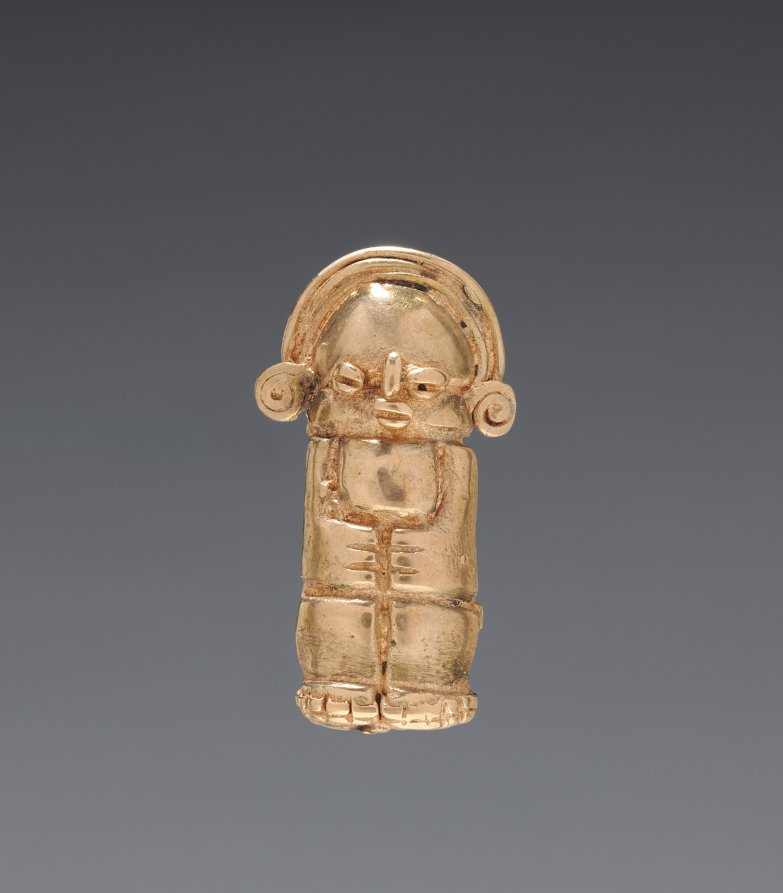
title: Necklace Figurine Bead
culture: Colombia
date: 1–700 CE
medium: cast gold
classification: Jewelry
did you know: Working with gold dates back to at least 500 BC in Ecuador and Colombia.